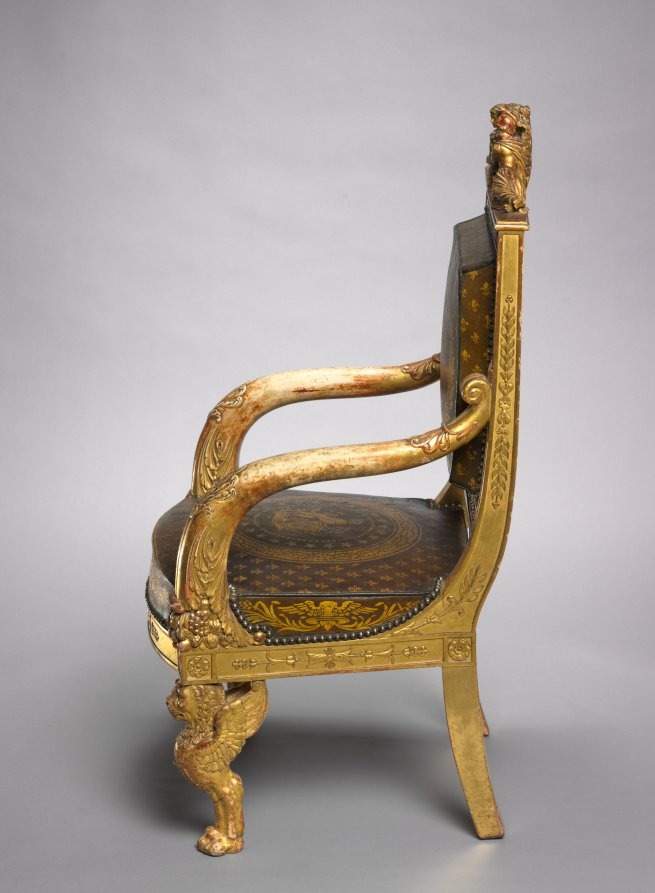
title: Child's Throne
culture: France, Paris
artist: Pierre-Marie Balny le Jeune (French, 1832)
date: 1822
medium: carved and gilded wood, leather upholstery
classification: Furniture and woodwork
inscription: inscribed with stencils inside back rail: BLONDEL TAPISSIER/RUE ST. ANTOINE N 72 1822 inscribed in ink lower edge back rail: 12 JANVIER 18[22?]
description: This chair was made for the young, presumed successor to the French throne who ruled briefly as Henri V in 1830, the last of the direct Bourbon line. He is depicted at the center of the top rail protected by female figures representing France and Minerva, the Roman goddess of wisdom. Fleurs-de-lis and the Gallic rooster, symbols of French royalty and the French people, decorate the upholstery.